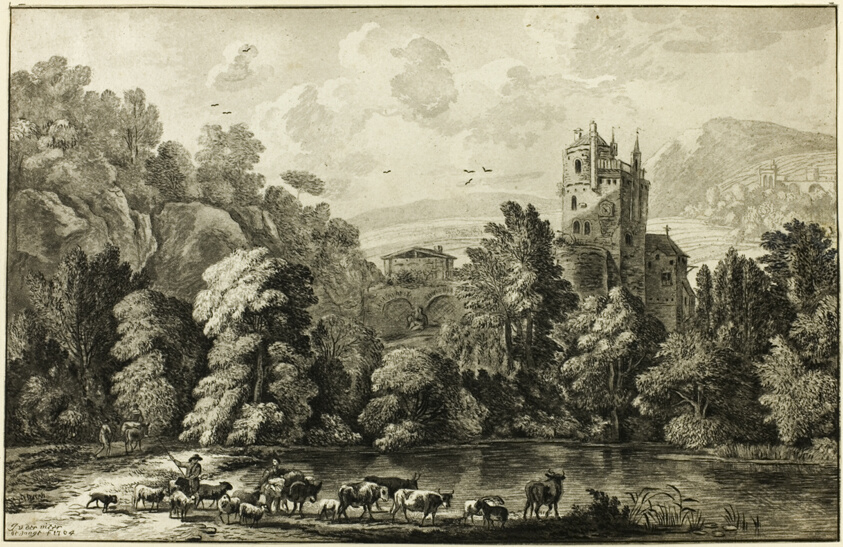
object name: Print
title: Landscape with Cattle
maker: Jacob Cornelis Ploos van Amstel (Dutch, 1726-1798); after Jan Van Der Meer (Dutch, 1656-1705)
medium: Print on paper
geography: Netherlands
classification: aquatint; print; prints and drawing